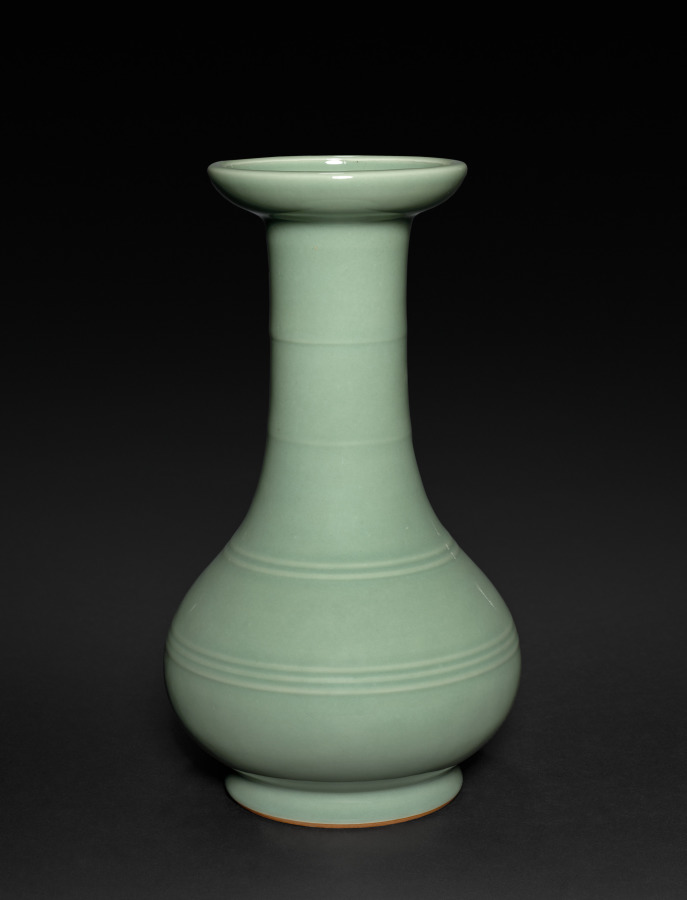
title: Vase with Bamboo Joints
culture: Japan, Taishō period (1912–26)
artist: Seifū Yohei IV (Japanese, 1872–1951)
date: 1914–46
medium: Porcelain with green glaze and molded design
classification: Ceramic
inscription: 清風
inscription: 清風造【印】清風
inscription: 成山清風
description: Yohei IV’s Vase with Bamboo Joints has a shape often seen in pairs of bronze flower vases placed to either side of Buddhist altars before sculptural icons. While the term hisoku (Chinese mise 秘色), or “mysterious color” glazing, indicates a more specific green color than seiji 青磁, a more general word for green-glazed porcelain, there is still some range in the actual color of the glaze.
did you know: Many ceramics created by the Seifū Studio refer to and emulate Chinese ceramics in form and glazing.